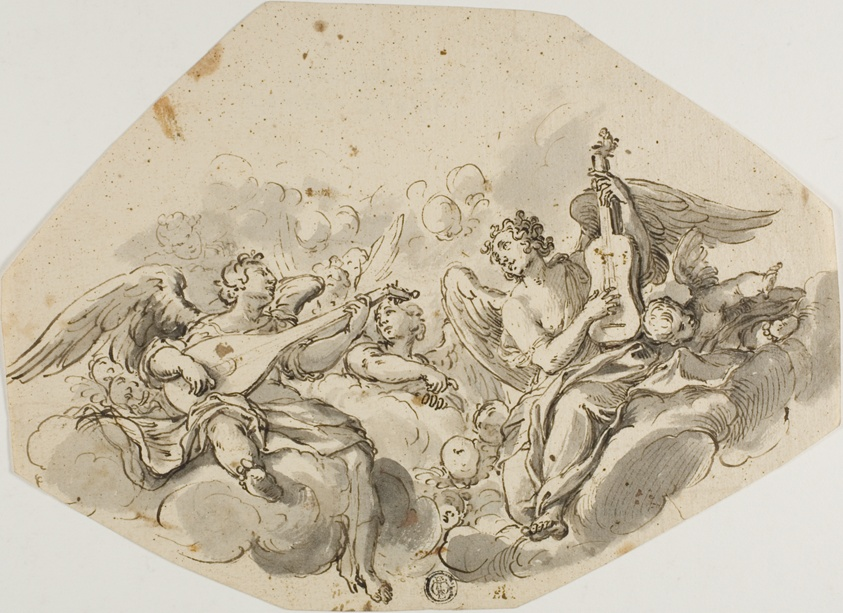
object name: Drawing and Watercolor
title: Musician Angels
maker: Attributed to Giovanni Battista Tiepolo; Italian, 1696–1770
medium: Pen and brown ink, with brush and gray wash, on cream laid paper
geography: Italy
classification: pen and ink drawings; drawings (visual works); prints and drawing